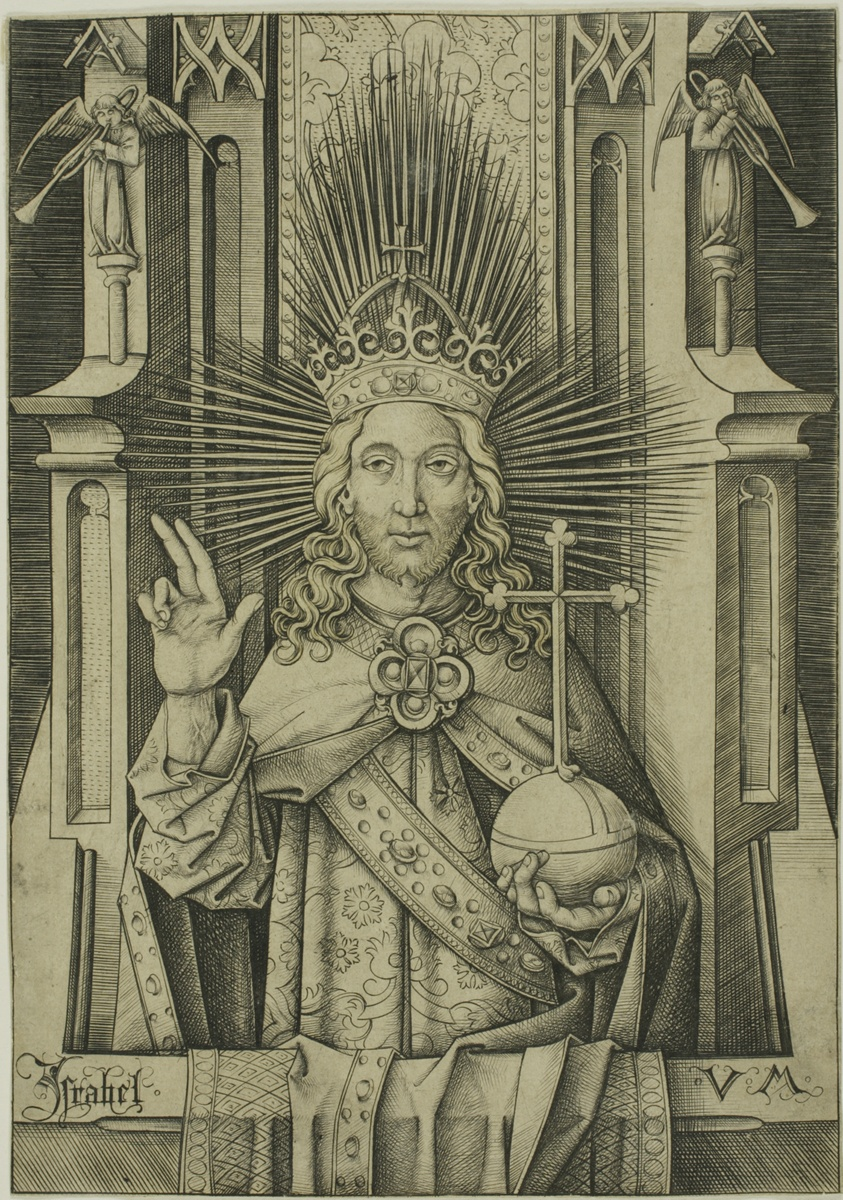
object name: Print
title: The Saviour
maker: Israhel van Meckenem the Younger; German, c. 1440/45-1503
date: 1490/1500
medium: Engraving on cream laid paper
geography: Germany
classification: engraving; print; prints and drawing